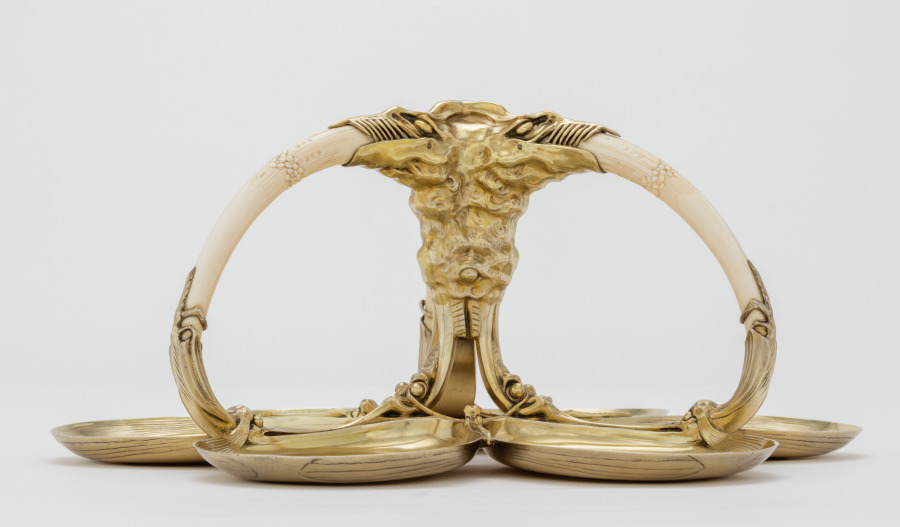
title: Salver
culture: France, Paris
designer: Carlo Bugatti (Italian, 1856–1940)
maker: Adrien-Aurélien Hebrard (French, 1866–1937)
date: c. 1907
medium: Gilt silver and ivory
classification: Silver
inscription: inscribed inside one of six ovoid compartments: "Bugatti" in ligature. Engraved on back: A.A. HEBRAND/ 8 RUE ROYAL/PARIS FRANCE.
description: This tea and coffee service, salver, and table, together with some now missing cups, were all designed by Carlo Bugatti as an ensemble and presented at the 1902 exposition devoted to decorative arts in Turin, Italy. The set was probably acquired from Bugatti's 1907 exhibition at the Galerie Hébrard in Paris by a wealthy South African widow, Anna Blake, who was living there at the time. Some of the animal and insect motifs suggest mythical beasts or the fossils of prehistoric animals. When Mrs. Blake returned to Cape Town, she took these and other pieces designed by Bugatti with her, and they remained in South Africa throughout her lifetime.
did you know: Carlo Bugatti's sons achieved illustrious careers of their own. Rembrandt Bugatti (1884-1916) became a celebrated sculptor, and Ettore Bugatti (1881-1947) manufactured luxurious automobiles and racing cars.